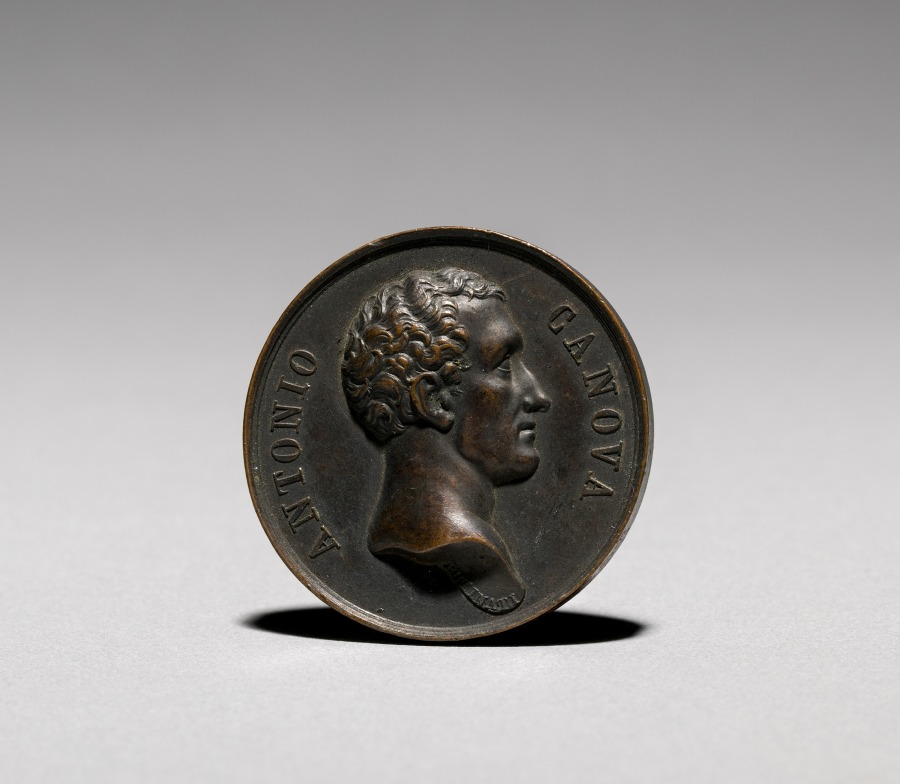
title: Medal: Antonio Canova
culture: Italy, 19th century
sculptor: Francesco Putinati (Italian, 1775–1848)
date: early-mid 1800s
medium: bronze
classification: Metalwork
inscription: "ANTONIO CANOVA"; signed: Putinati."